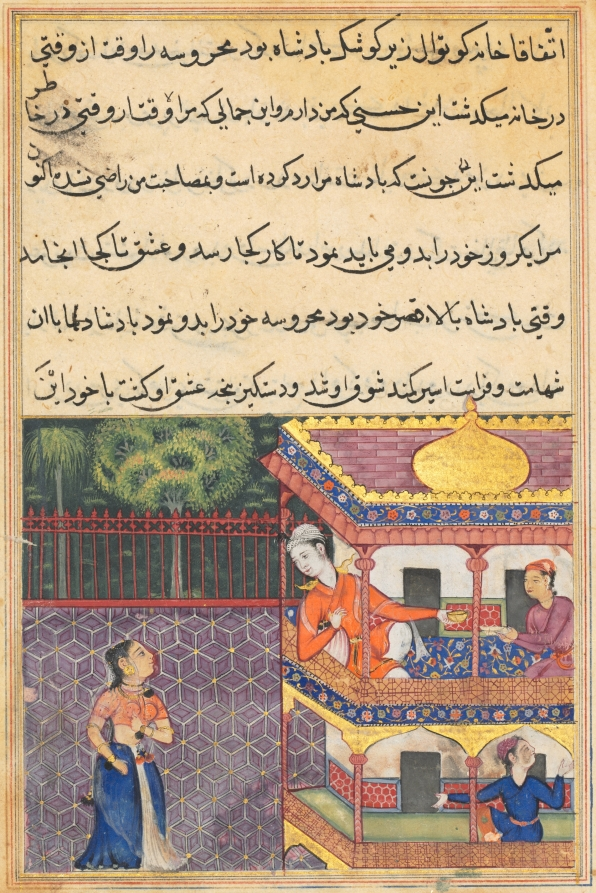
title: The king of Zabul sees Mahrusa from his palace balcony, from a Tuti-nama (Tales of a Parrot): Thirty-sixth Night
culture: Mughal India, court of Akbar (reigned 1556–1605)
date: c. 1560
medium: gum tempera, ink, and gold on paper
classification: Painting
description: The king peers into the courtyard from the balcony of his palace. Upon seeing Mahrusa, he is immediately captivated by her beauty and falls deeply in love despite his vizier’s attempts to keep them apart. The king is so enamored with Mahrusa that he becomes lovesick and ultimately dies.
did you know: Gold flames issue from the king’s shoulders suggesting both his royal glory and passionate love.